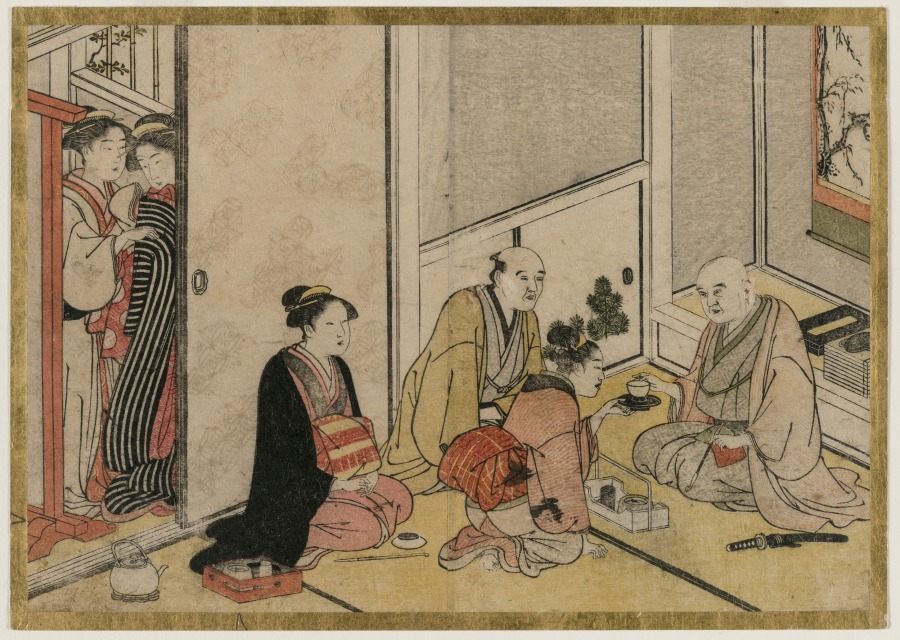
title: Interior Scene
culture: Japan, Edo period (1615–1868)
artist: Katsukawa Shunshō (Japanese, 1726–1792)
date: c. 1746–92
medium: color woodblock print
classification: Print